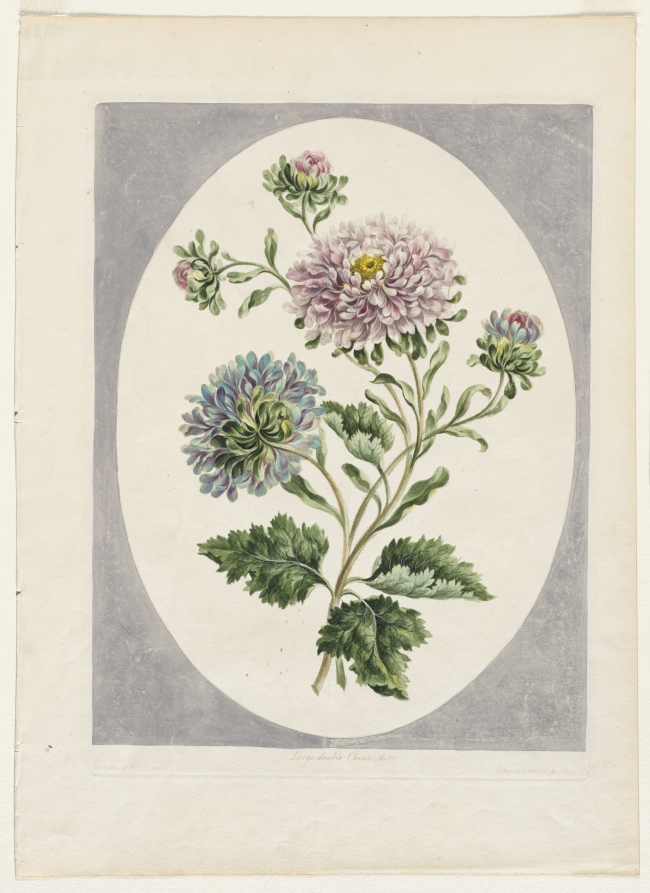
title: A Collection of Flowers Drawn from Nature: Large Double China Aster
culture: England, late 18th-early 19th Century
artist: John Edwards (British)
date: 1798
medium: etching, hand colored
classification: Print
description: Edwards was one of the best botanical draftsmen of the 18th century. Large Double China Aster is from a superb and extremely rare book with 77 plates illustrating a variety of beautiful flowers. The coloring is particularly fine owing to the use of pale printer’s ink that does not interfere with the delicacy of the watercolor.